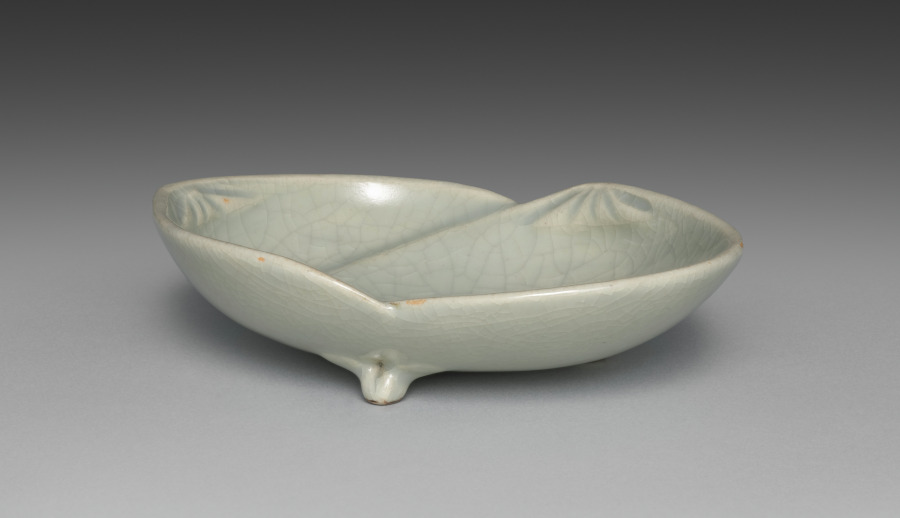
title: Dish from Dishes with Matching Shells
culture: Japan, Meiji period (1868–1912)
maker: Seifū Yohei III (Japanese, 1851–1914)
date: 1893–1914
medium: One of a pair of dishes; porcelain with celadon glaze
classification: Ceramic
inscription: 清風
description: Yohei III’s main output for his sophisticated clientele was in the form of tea sets and dining sets. He created a range of dishes in green glazes. He often produced in pairs, sets of five, or sets of ten. This pair of shell dishes have a box lid interior attestation by Yohei IV that the dishes were made by Yohei III with a cracked-ice (hyōretsu) pattern in the glaze, omitting reference to any glaze coloration.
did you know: These shell-shaped dishes are of the saucer type, suitable for dipping sauces.